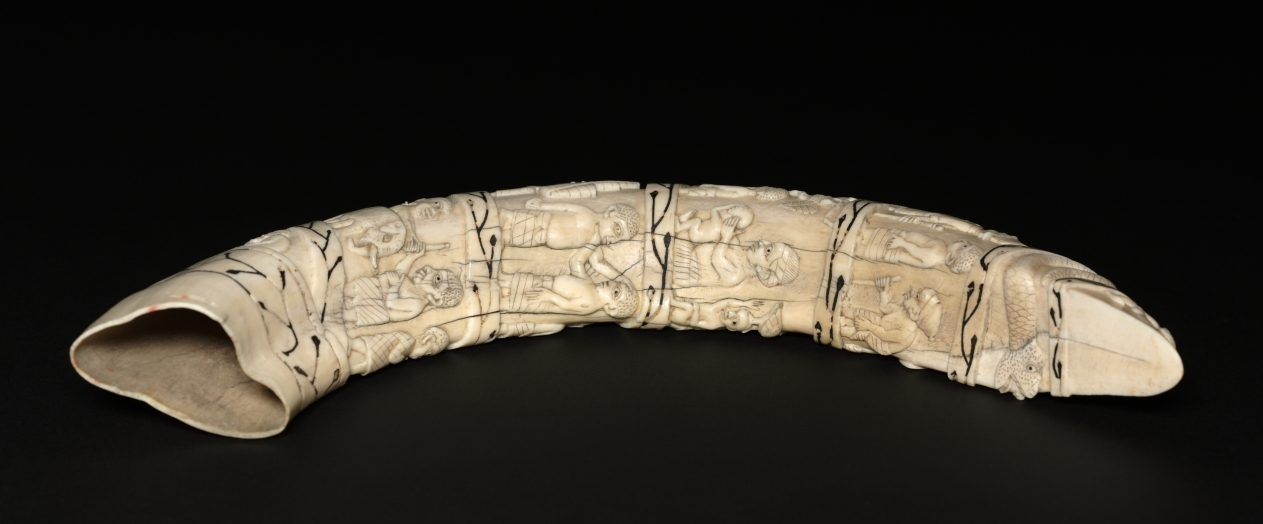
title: Carved Tooth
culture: Africa, Central Africa, Democratic Republic of Congo, Cabinda, or Republic of the Congo, probably Vili-style maker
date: late 1800s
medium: Hippopotamus ivory and organic material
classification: Sculpture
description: This is a fine example of art produced for sale to European visitors in the Lower Congo River area. A long history of cultural and artistic interactions between Africans and Europeans began in 1482, when the Portuguese first established diplomatic ties with the rulers of the Kongo kingdoms. Note the image of a foreign merchant pouring whiskey from a keg.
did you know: Spiral motifs have been found on Kongo Kingdom ivory carvings since at least the 1500s.